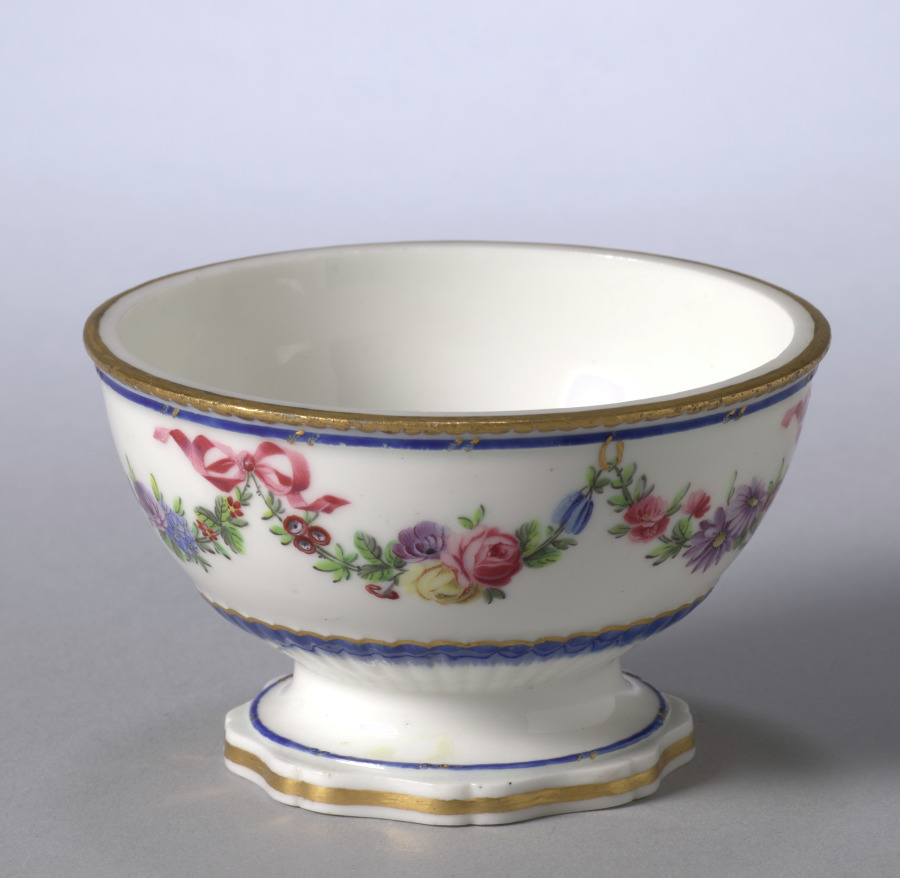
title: Sponge Box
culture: France, Sèvres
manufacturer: Sèvres Porcelain Factory (French, est. 1756)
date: c. 1769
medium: soft-paste porcelain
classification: Ceramic